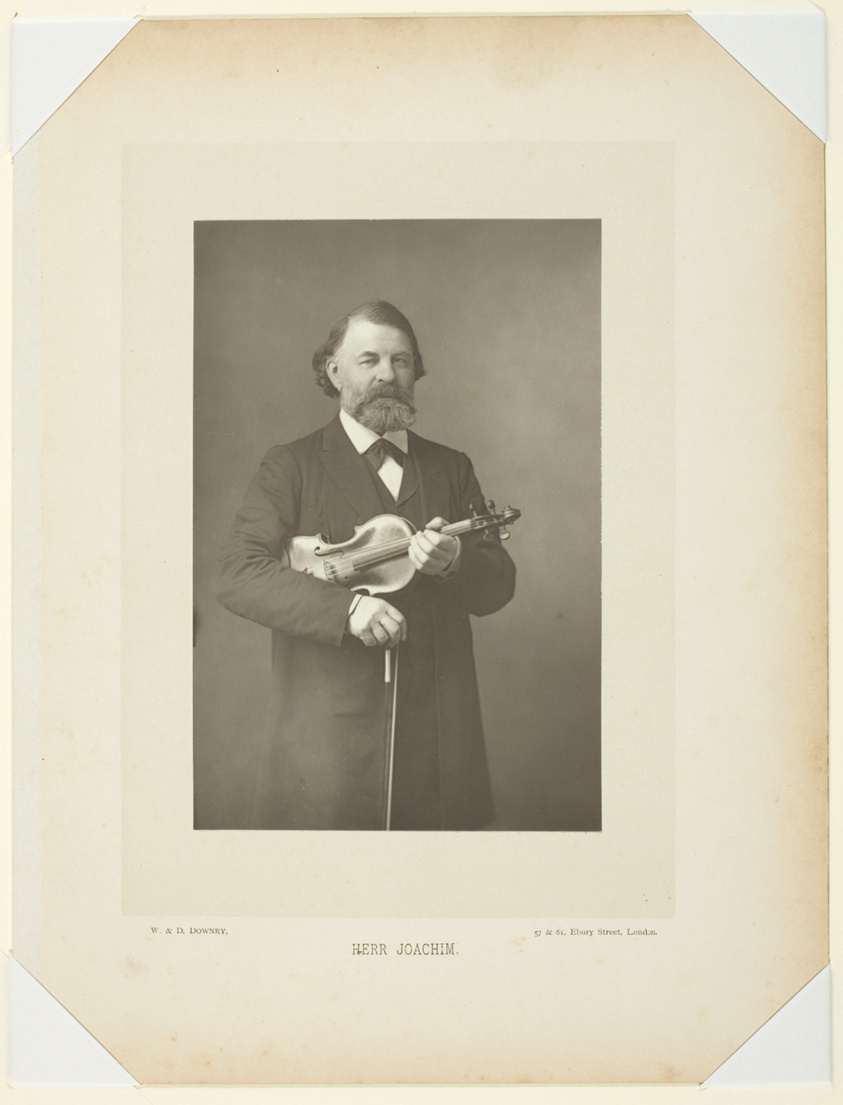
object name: Photograph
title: Herr Joseph Joachim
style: 19th century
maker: W. Downey (English, c. 1828–1908) and; D. Downey (English, active 1860–1905)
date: 1885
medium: Carbon print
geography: England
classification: carbon print; pigment process; photographic process; photography; photograph